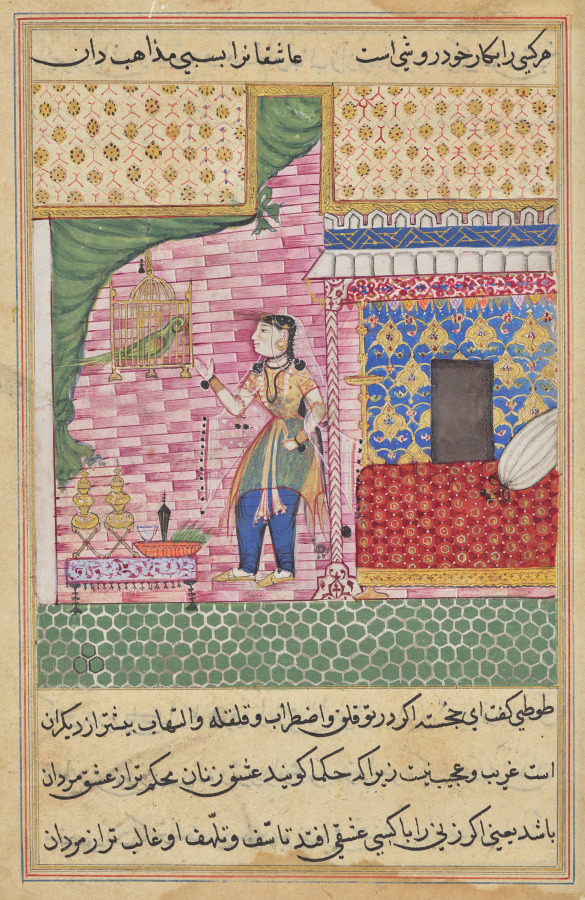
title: The Parrot Addresses Khujasta at the Beginning of the Seventeenth Night, from a Tuti-nama (Tales of a Parrot)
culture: Mughal India, court of Akbar (reigned 1556–1605)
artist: Sravana (Indian)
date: c. 1560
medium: gum tempera, ink, and gold on paper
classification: Painting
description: Tuti the talking parrot begins to tell Khujasta the story of a merchant named Mansur and his encounter with an imposter. Various features of the room, including the pale colors and flat composition are reminiscent of the pre-Akbar painting style.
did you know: The dark halo around Khujasta’s face indicates that her profile has been reshaped.